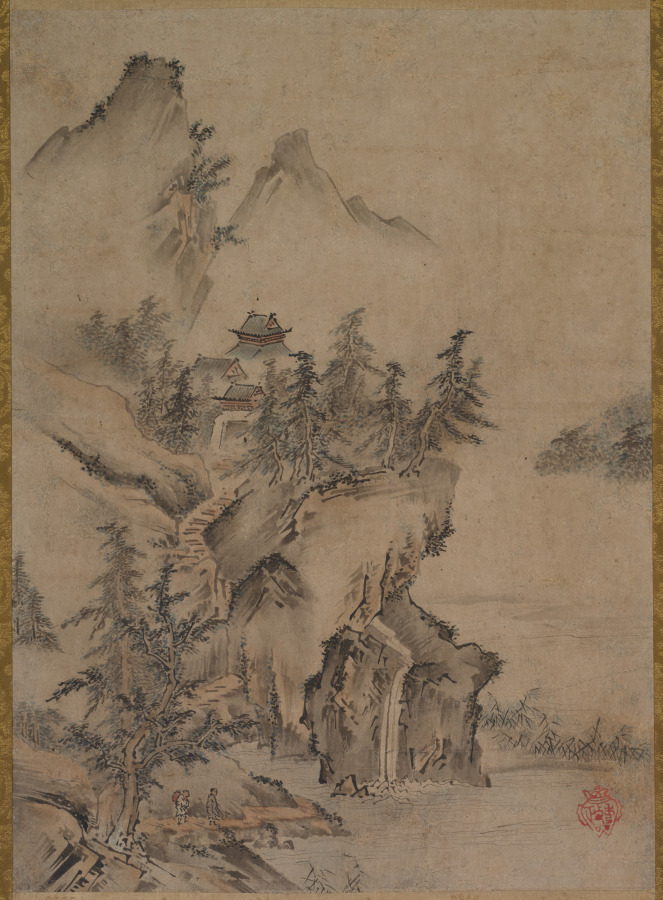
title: Chinese Literatus Traveling to a Mountain Temple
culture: Japan, Muromachi period (1392–1573)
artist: Kano Hidemasa (Japanese, active late 1500s)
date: late 1500s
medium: hanging scroll; ink and light color on paper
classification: Painting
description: This painting bears the seal of Kano Hidemasa, believed to be the son of Kano Hideyori (active mid- to late 1500s) of the important and prolific Kano family of painters. It features a traveler and his servant in a Chinese setting. The two are on their way to a temple up the stairs, climbing the steep slope of the mountain ahead of them. The traveler, who wears clerical garb, has paused to admire and listen to the sound of a nearby waterfall. The painting is a charming interpretation of a scene that might be found in Song dynasty album leaves imported to Japan.